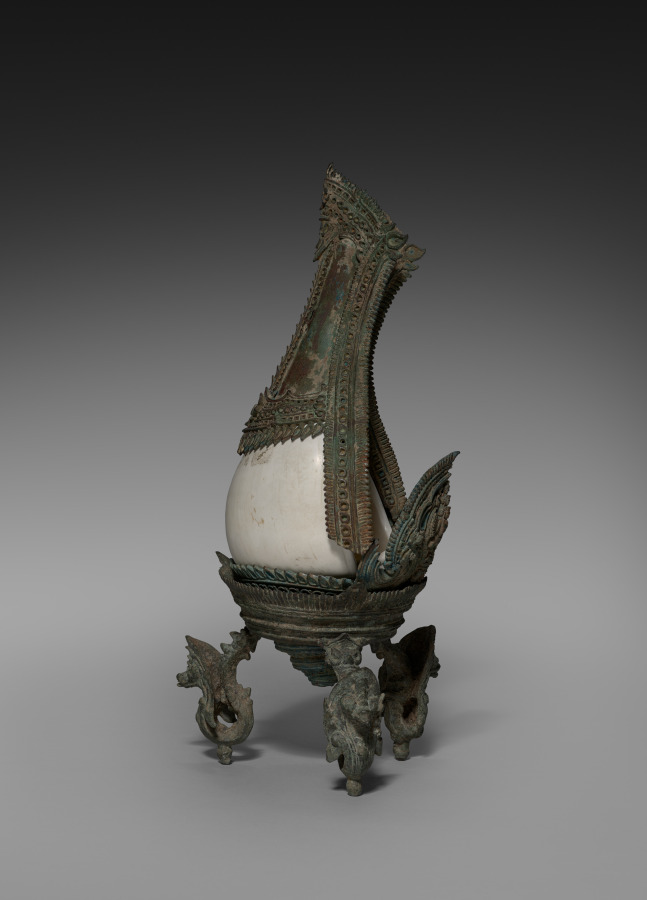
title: Conch Shell with a Figure of Hevajra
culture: Cambodia, Khmer, Angkor Period, 12th-13th Century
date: 1100s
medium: shell and bronze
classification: Sculpture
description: A royal temple like Banteay Chhmar was built for performing rituals and to honor images of gods, Buddhas, and other sacred or enlightened beings for the sake of the kingdom’s protection and ongoing prosperity. Conch shells were blown at the start of rituals to make the sound corresponding to the syllable om. The dancing figure of Hevajra, a Buddhist being of enlightenment with eight heads, sixteen arms, and four legs, has been worked into the bronze embellishment of the shell. Hevajra was elevated to a prominent position in Khmer Buddhism of the Angkorian period as the standard figure denoting the practice of rituals prescribed in a text called the Hevajra-tantra. The tripod stand with three serpents is probably not original to the shell.